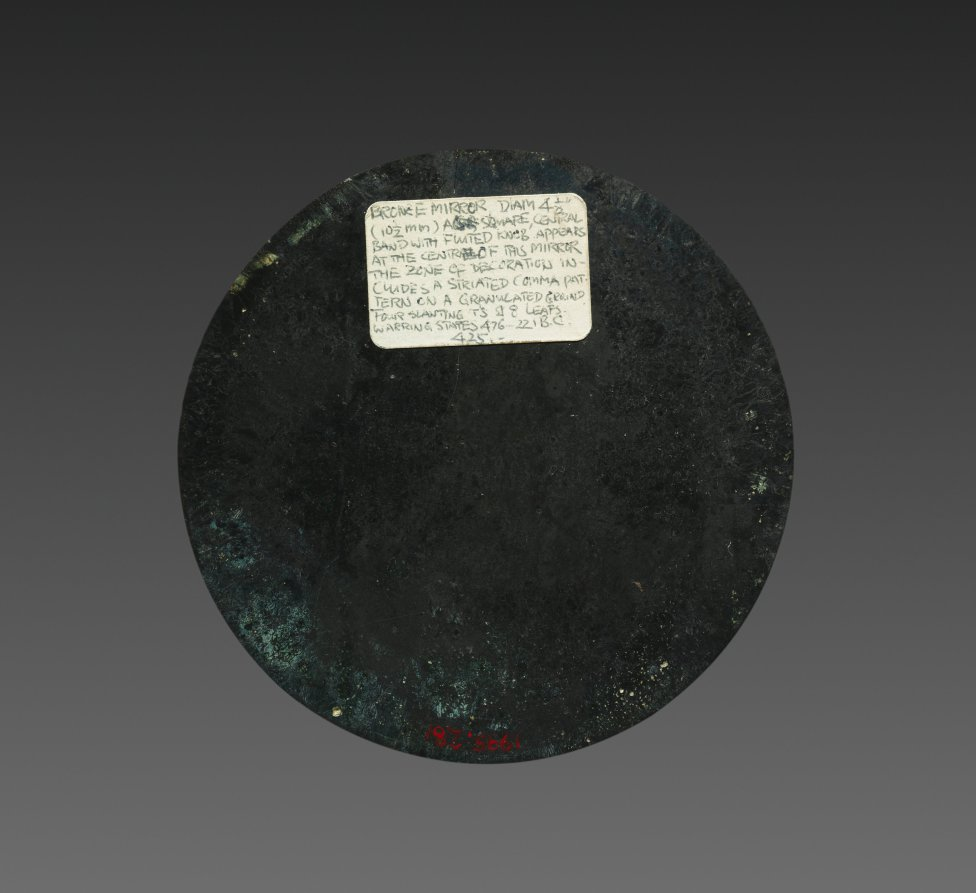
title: Mirror with Four T's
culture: China, Warring States period (475–221 BCE)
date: 300s BCE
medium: bronze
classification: Metalwork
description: The symbolic significance of the ancient Chinese mirror lies in its circular form and reflective quality that make it resemble the sun and the moon. "By the light of the sun, the world is made bright," so said a mirrorsmith. When the mirror was taken with its owner for use in the afterlife, it reflected the soul and brought eternal brightness to the next world.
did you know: The prominent T's on this mirror represent four gates in Chinese mythology that relate to transformation.